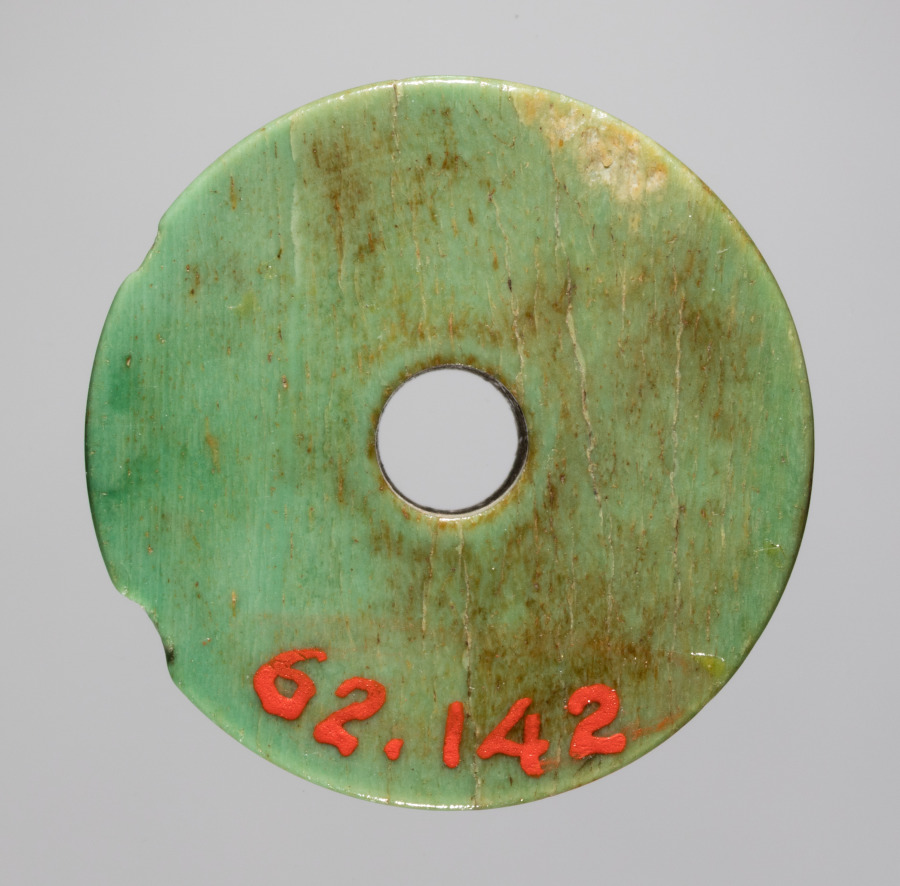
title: Spindle Whorl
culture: Iran, early Islamic period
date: 700s - 900s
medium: bone, incised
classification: Spindle Whorl